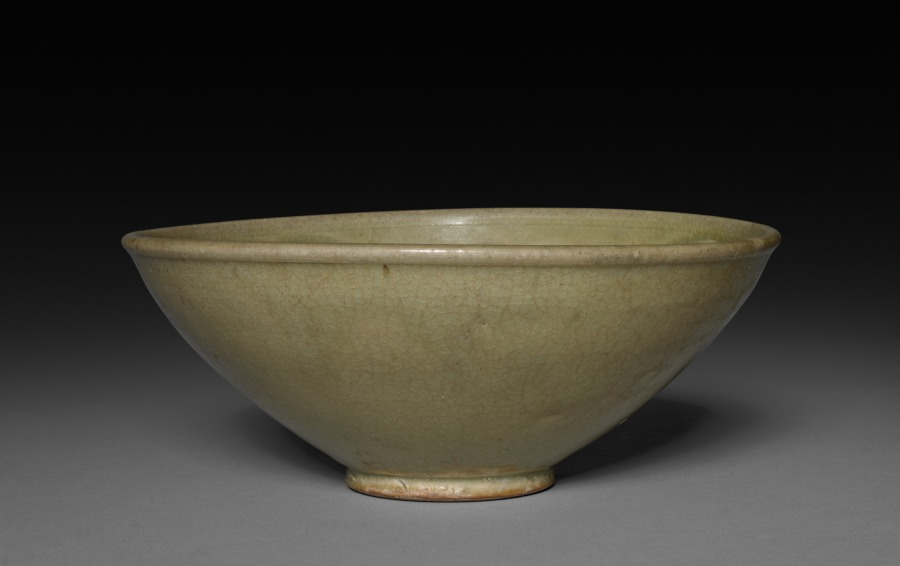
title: Bowl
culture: China, Jin dynasty (1115-1234)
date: 1100s-1200s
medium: Glazed light gray porcelain, Northern Celadon ware, Yaozhou type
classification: Ceramic